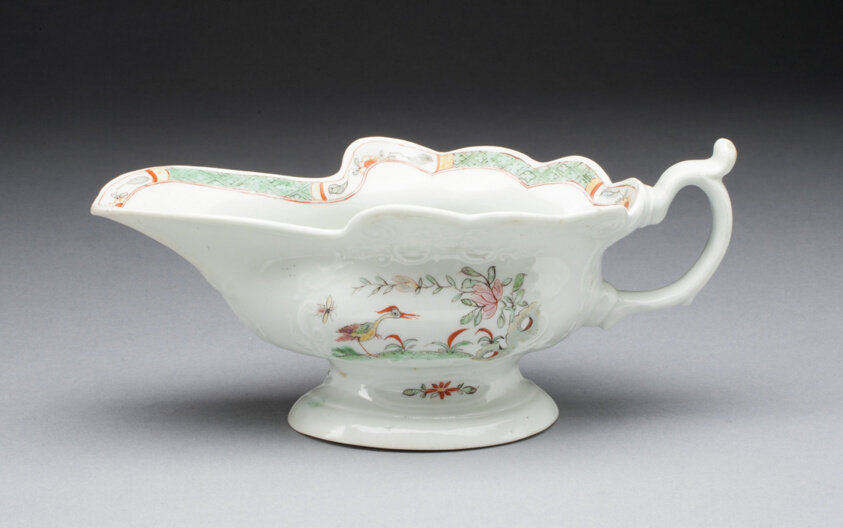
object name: Ceramics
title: Sauceboat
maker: Worcester Porcelain Factory (Warmstry House Period, 1751–1783); Worcester, England, founded 1751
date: c. 1755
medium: Soft-paste porcelain with polychrome enamels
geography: Worcester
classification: ceramics; tableware; porcelain; european decorative arts